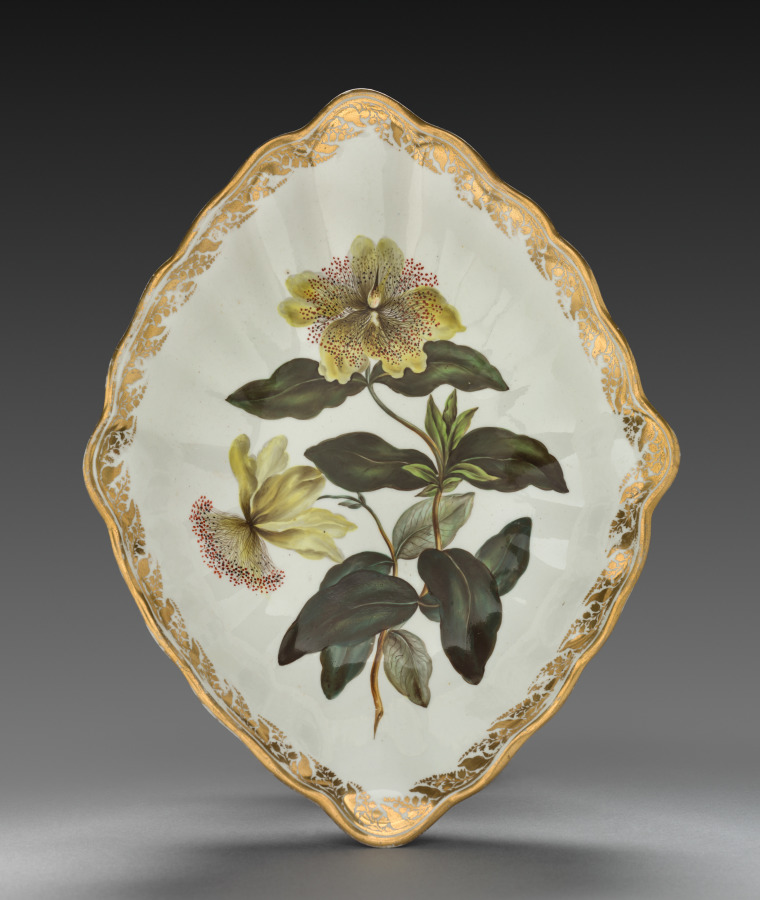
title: Lozenge Shaped Dish from Dessert Service: Large Flowered St. John's Wort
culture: England, Derby, 18th century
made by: Derby (Crown Derby Period) (British)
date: c. 1800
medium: porcelain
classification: Ceramic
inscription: inscribed in blue on back: Hypericum Colcinum./Large-flowerd St. John's Wort./crown/crossed batons and dots/D/115. Near edge: 9.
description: Each dish is decorated with recognizable plants, the names of which are inscribed on the base in both Latin and English. Identifying the blossoms only became customary in the late 18th century when a single piece of porcelain was decorated with one species, and flowers were represented along with leaves, stems, seed pods, and roots. All of this reflects Carolus Linnaeus’s recent invention of a scientific method to categorize all known flora. The decorations on the Derby factory’s products derive from contemporary English botanical publications. For instance, illustrations in William Curtis’s The Botanical Magazine served as models for the French marigold and nettle-leaved bell flower on the dessert service.